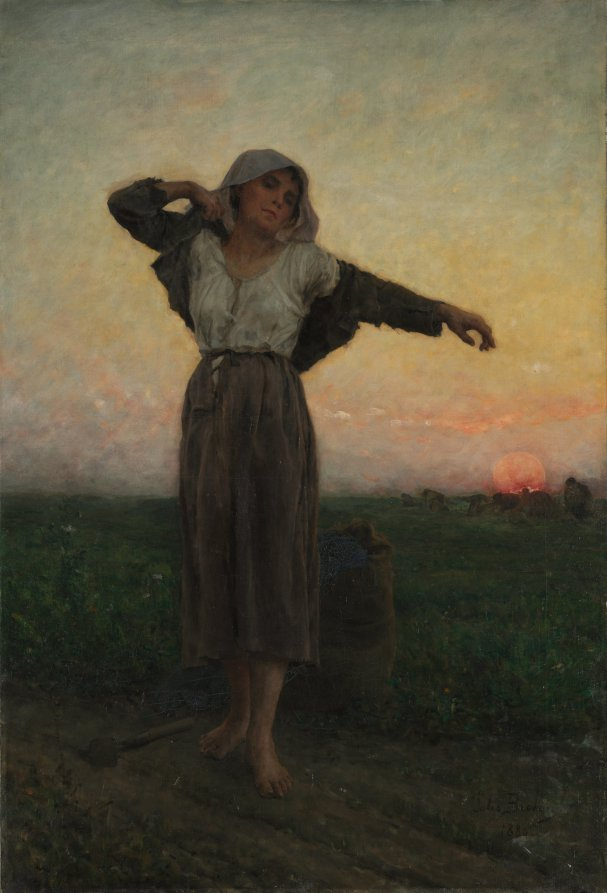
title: The Tired Gleaner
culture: France, 19th century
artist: Jules Breton (French, 1827–1906)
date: 1880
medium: oil on fabric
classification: Painting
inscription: Signed in black paint lower right corner: Jules Breton 1880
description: Gleaning—or picking up what little grain remains after a wheat field has been harvested—was usually the job of the poor, especially women and children. Breton shows a single gleaner stretching against a backdrop of the setting sun, while behind her others still labor in the field. Her bare feet and worn, simple clothing immediately identify her as a peasant. At the same time, however, her expansive gesture and the subdued tones of her skin and clothes link her to the surrounding landscape, both visually and symbolically. This painting not only suggests the hardships of peasant life, but also the grand link between humanity and the land. Like many of his successful contemporaries, Breton met demand for his paintings by copying and making variations of his own works. This picture is similar to a larger, more famous painting that was exhibited in the Paris Salon of 1880. The Cleveland collector Hinman H. Hurlbut, who bought this canvas from the artist, probably commissioned Breton to make this smaller variation of the larger painting.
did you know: Breton felt a sense of connection with peasant life, growing up in a small village of rural workers; however, his father's standing as a property manager to a duke allowed Breton to receive a classical arts education.